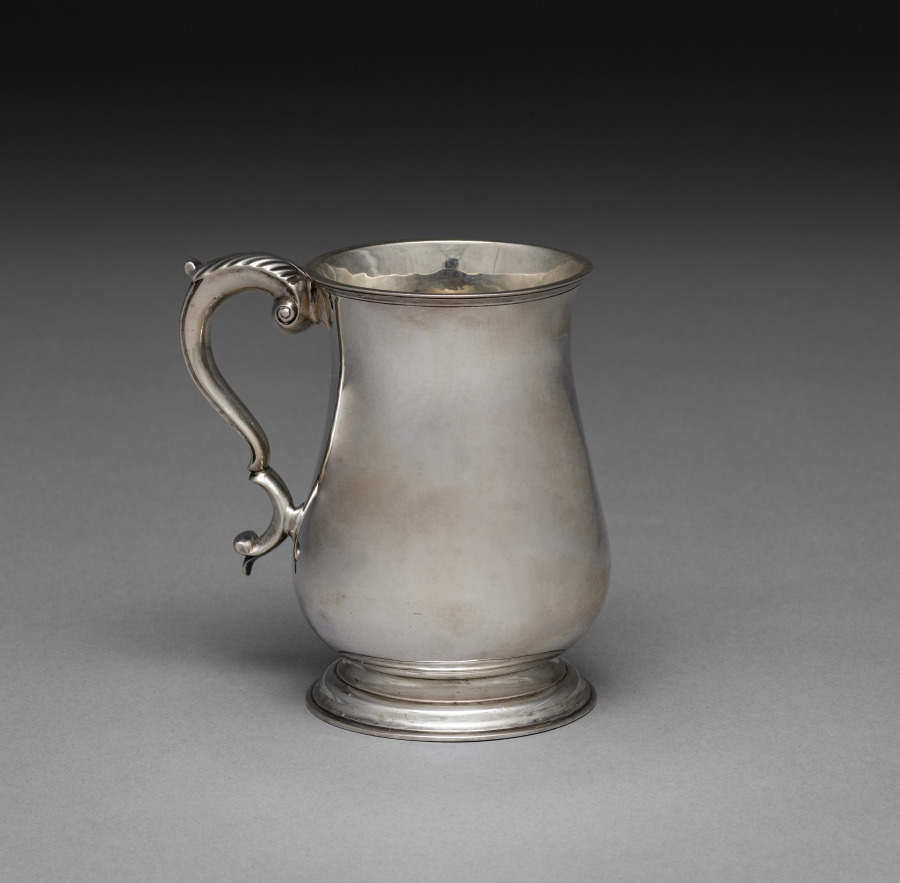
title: Cann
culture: America, Pennsylvania, Philadelphia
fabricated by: Thomas Shields (American)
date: c. 1765–75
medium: silver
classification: Silver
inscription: Scratched underside: "15-3" and illegible scratches